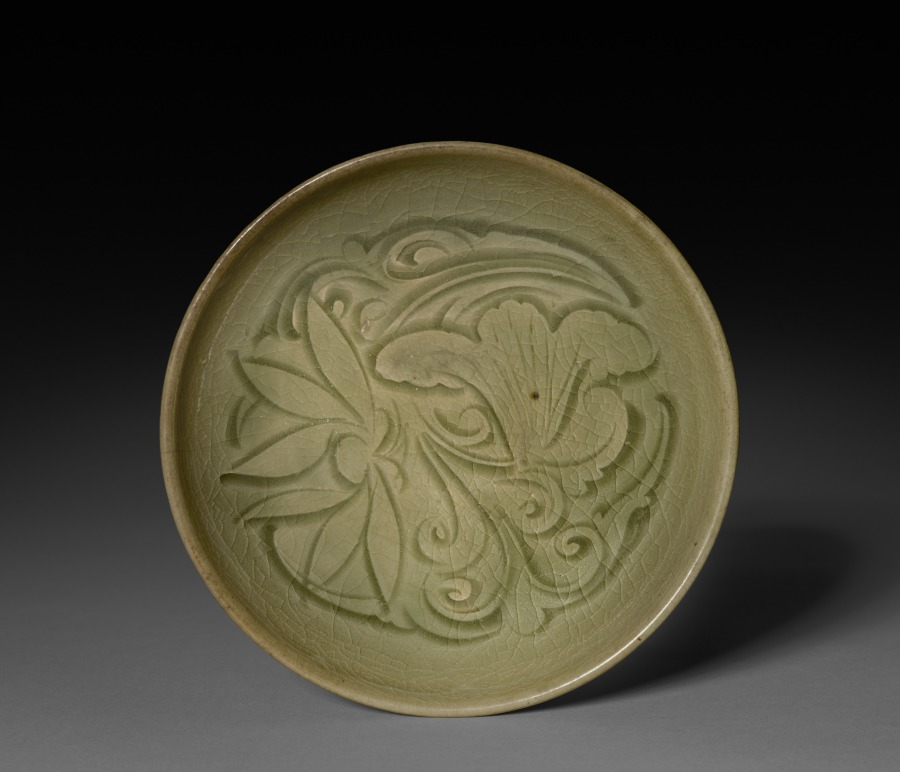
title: Saucer: Northern Celadon Ware, Yaozhou type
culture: China, late Northern Song dynasty (960-1127) - Jin dynasty (1115-1234)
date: 1100s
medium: glazed stoneware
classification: Ceramic